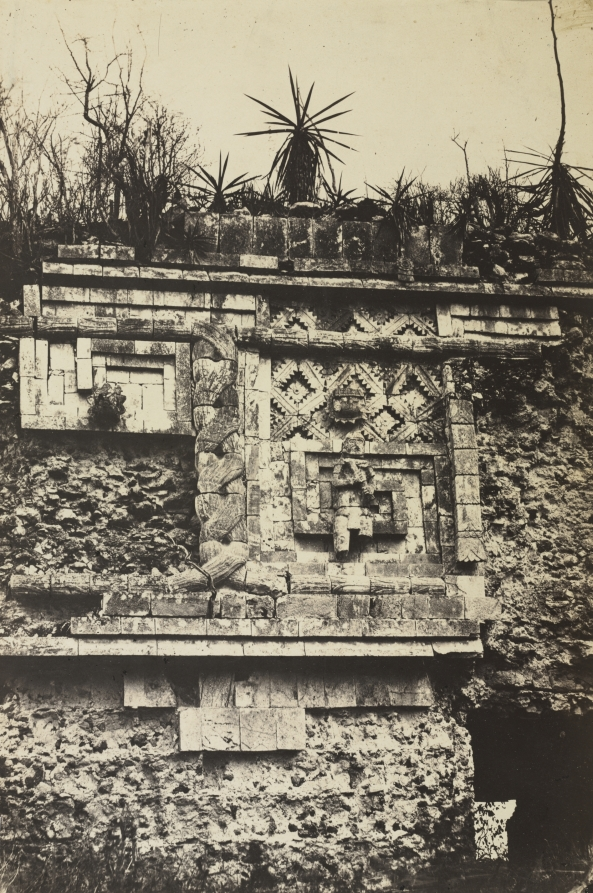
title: The Nunnery, Uxmal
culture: France, 19th century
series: Cités et ruines Américaines: Mitla, Palenque, Izamal, Chichén-Itzá, Uxmal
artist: Claude-Joseph-Désiré Charnay (French, 1828–1915)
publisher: Gide et J. Baudry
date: 1860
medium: albumen print from wet collodion negative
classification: Photograph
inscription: Written in ink on verso: "T.C. Bigelow / Western Court Facade / Called the 'Serpent Temple' "